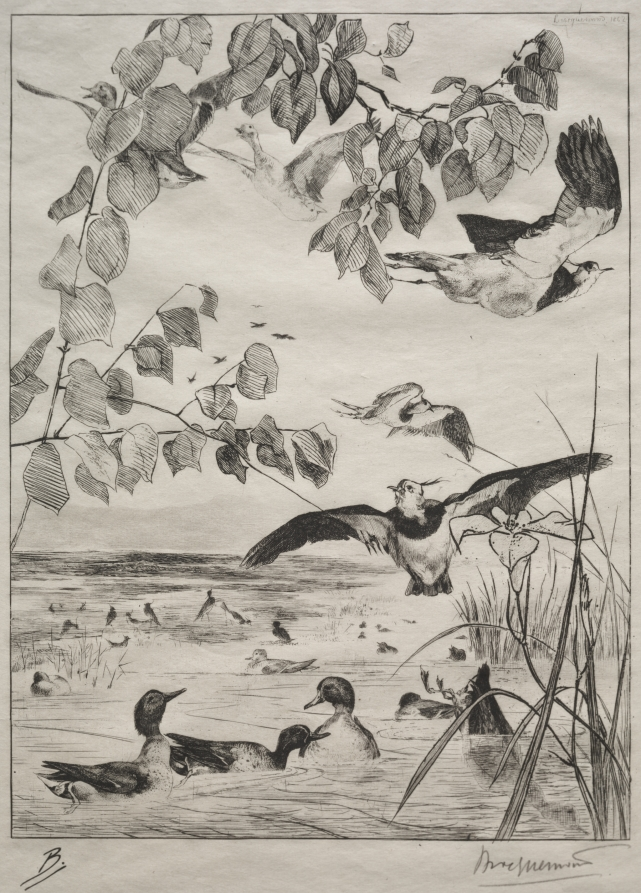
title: Lapwings and Teals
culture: France, 19th century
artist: Félix Bracquemond (French, 1833–1914)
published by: Alfred Cadart (French, 1825–1875)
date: 1862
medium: etching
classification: Print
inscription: signed, lower right, in graphite: Bracquemond; signed and dated upper right, in plate: Bracquemond 1862; printed, lower left: B.